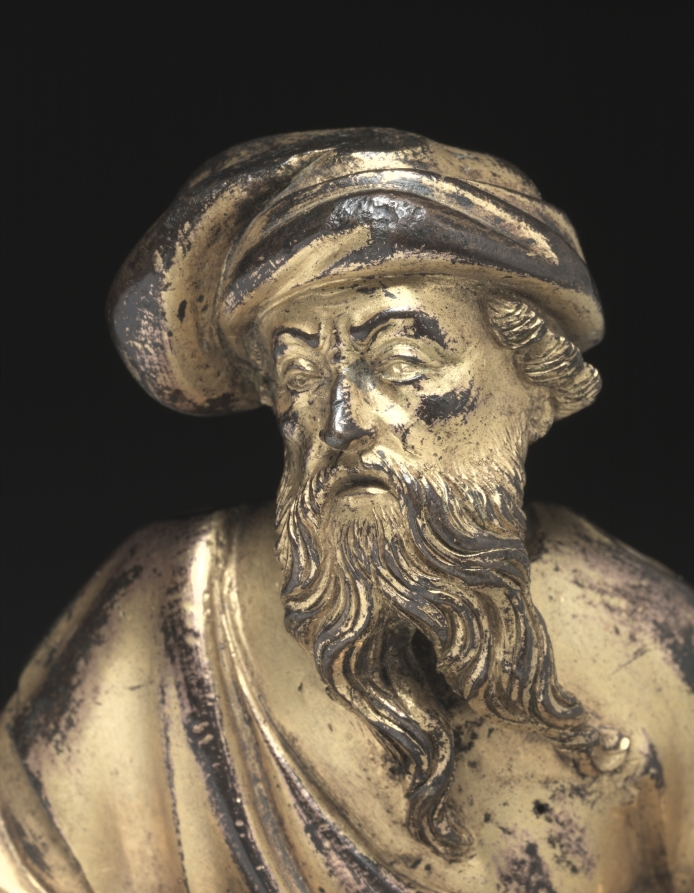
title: Kneeling Prophet from the Reliquary Chasse of Saint-Germain-des-Prés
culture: France, Paris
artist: Jean de Clichy (French)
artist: Gauthier du Four (French)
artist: and Guillaume Boey (French)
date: 1409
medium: gilt bronze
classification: Sculpture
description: This figure is one of only two known surviving fragments of the Reliquary Châsse of Saint-Germain. Fashioned from silver, gold, and precious stones, it was designed to hold the body of the saint. A contract from 1409 gives the names of the commissioned goldsmiths: Jean de Clichy, Gautier du Four, and Guillaume Boey.The reliquary was housed in the ancient Benedictine Abbey of Saint-Germain-des-Prés in Paris and formed the monastery’s great treasure until it was destroyed in the French revolution. The exquisite modeling of the prophet, originally a supporting foot of the reliquary, reveals the sophistication of Paris around 1400.